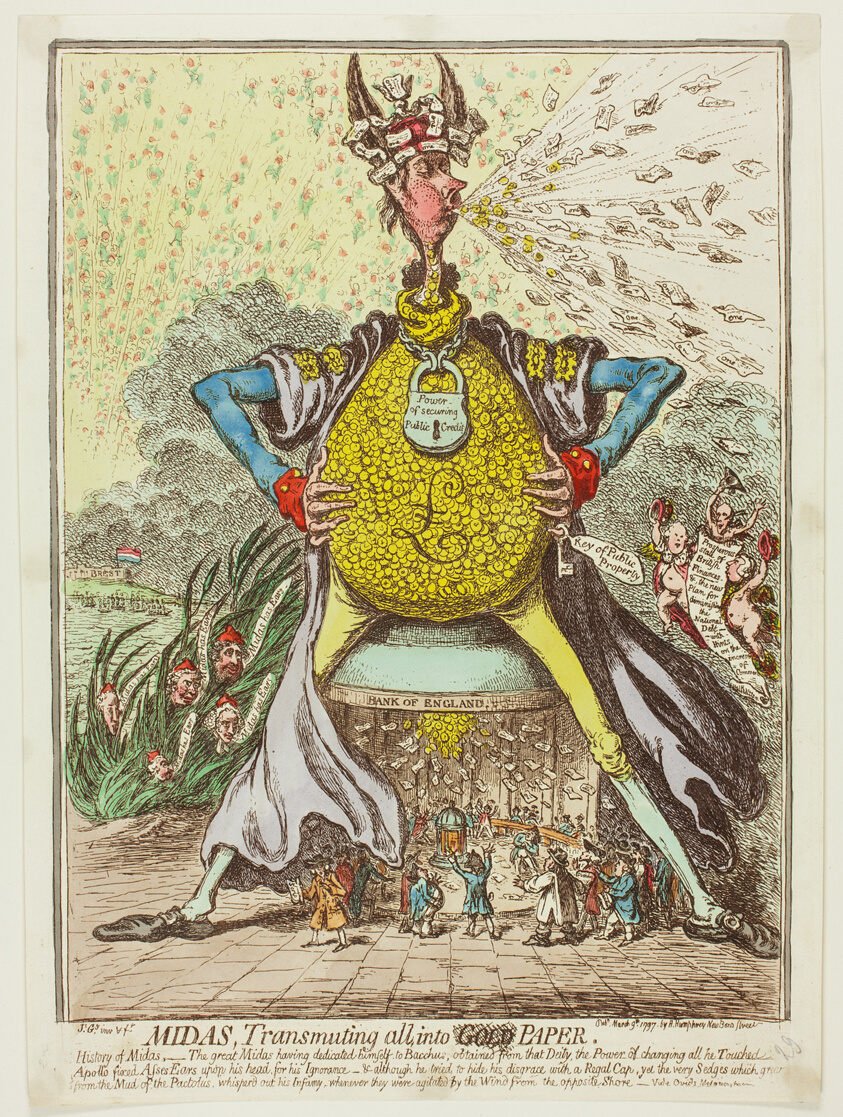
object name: Print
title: Midas, Transmuting All, Into Paper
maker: James Gillray (English, 1756-1815); published by Hannah Humphrey (English, c. 1745-1818)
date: published March 9, 1797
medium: Hand-colored etching on paper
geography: England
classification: etching; print; prints and drawing